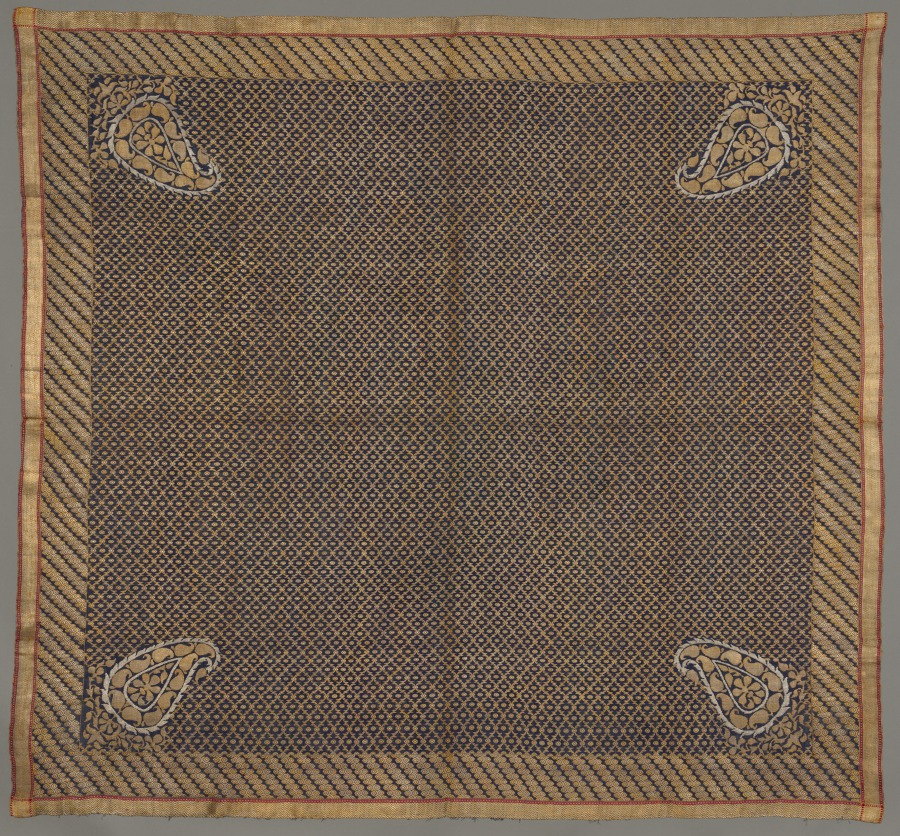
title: Fragment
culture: India, 19th century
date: 1800s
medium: brocade; silk, gold and silver threads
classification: Textile